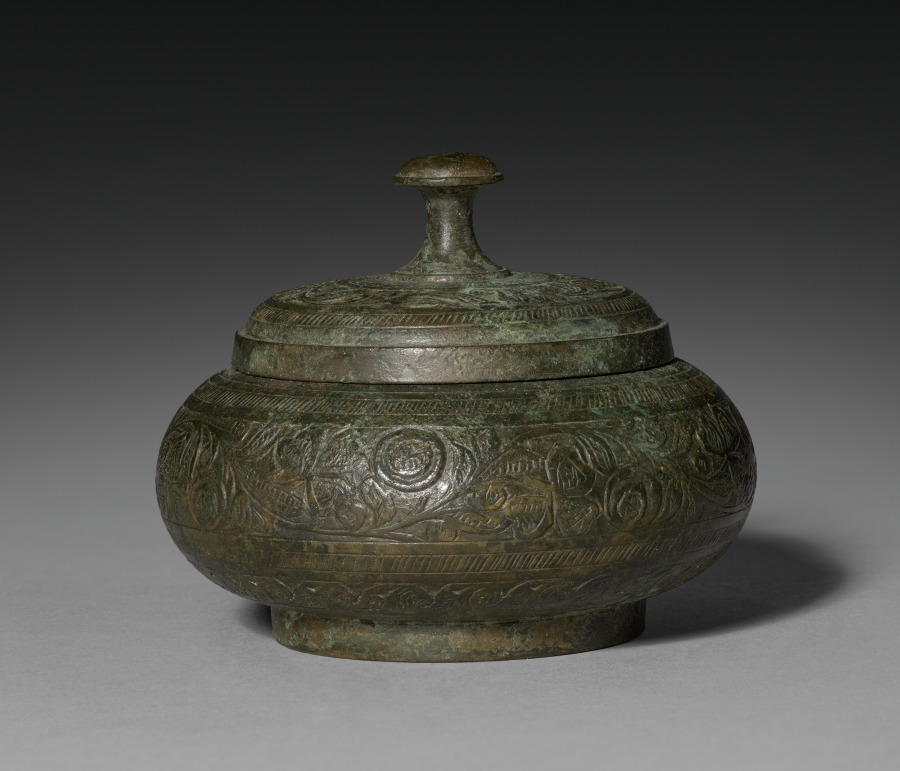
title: Reliquary Box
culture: Pakistan, Gandhara, probably Swat, late Kushan period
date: 200–400 CE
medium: bronze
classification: Metalwork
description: This casket in bronze represents the great variety of reliquary caskets. It is round, has a low foot, and is covered with a lid (with raised handle) that fits over the vessel rather than being inset. It is a traditional shape frequently encountered in Gandharan reliquaries, but its slight flattening and elaborate decoration imply a slightly late date. A central band of a floral creeper decorates the main body of the box and its lid, and is framed on both sides by narrower fluted bands. This type of freehand design is characteristic of the late Kusana-early Gupta period. Similar floral patterns are found in another CMA object (1972.164), the lid of a box showing combat between a man and a lion, which also dates to a later period. There the design fills the vacant areas in the busy composition. This pattern, however, has its antecedents in the Begram ivories . which, according to most sources, pre-date the Sasanian invasion of the mid-third century AD. Therefore, it can be assumed that this type of floral decoration was already in use in the third century and that this reliquary box probably dates to the third-fourth century AD. The bronze alloy, in its somewhat silverish-metallic appearance, seems to be very close to the material used in the Swat bronzes, which suggests that Swat may also be the provenance for this reliquary.